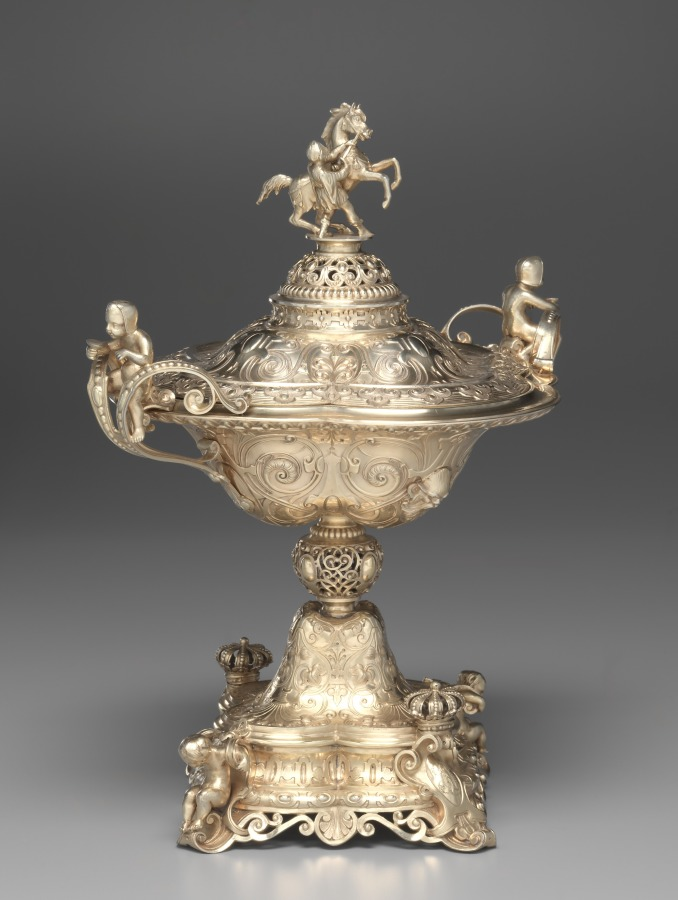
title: Centerpiece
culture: France, 19th century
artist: Charles-Nicolas Odiot (French, 1826–1868)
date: 1838–1848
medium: silver gilt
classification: Metalwork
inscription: engraved inside base: "ODIOT ORFEVRE DU ROI A PARIS"; engraved beneath crowns: "LP" (conjoined for King Louis Philippe of France).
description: Made for Louis Philippe (1773-1850), King of France 1830-48.